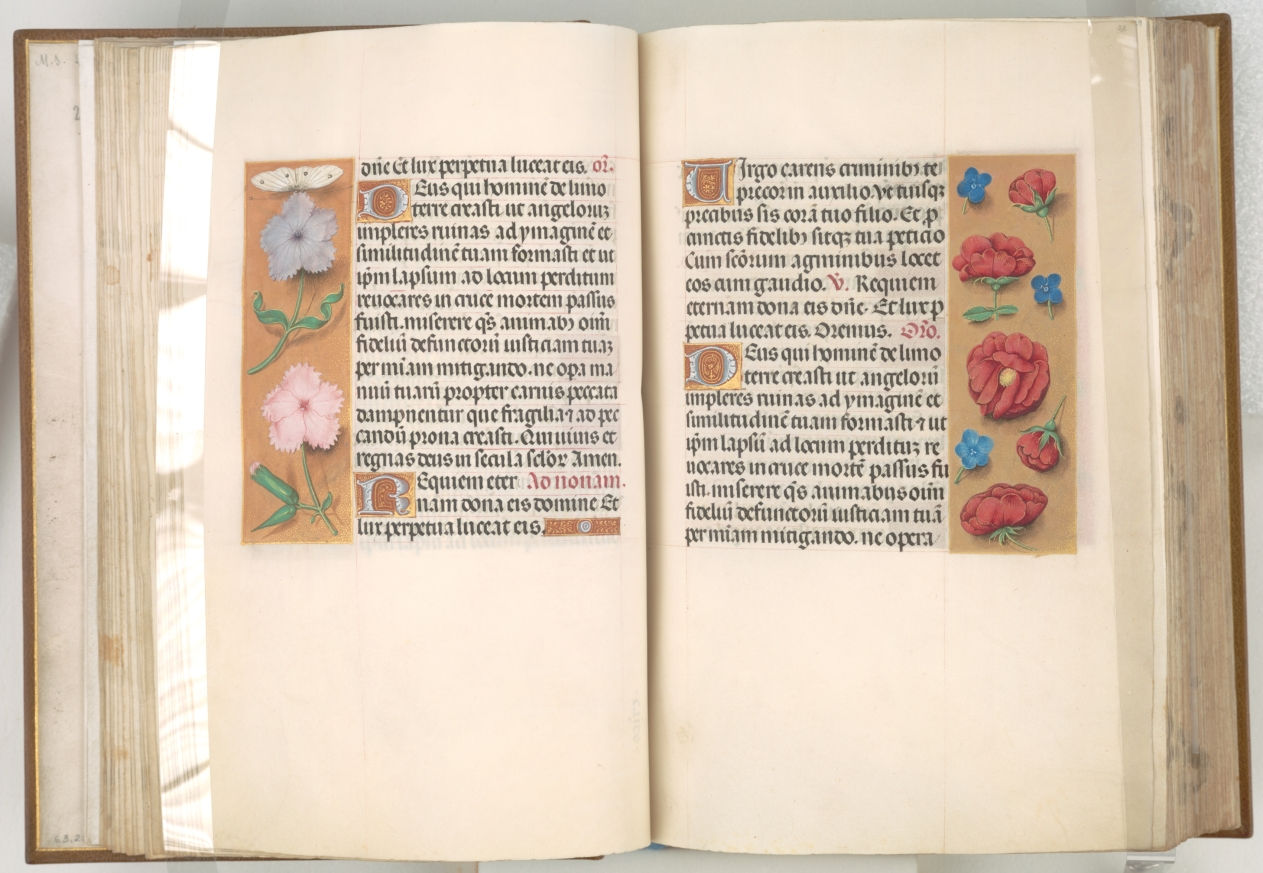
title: Hours of Queen Isabella the Catholic, Queen of Spain: Fol. 28r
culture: Flanders, Ghent and Bruges, late 15th century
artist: Master of the First Prayerbook of Maximillian (Flemish, c. 1444–1519)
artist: and Associates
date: c. 1500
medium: ink, tempera, and gold on vellum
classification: Bound Volume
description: A great lover of Flemish art, Queen Isabella treasured her many devotional books. This deluxe manuscript was created for her private devotions by highly organized and distinctly talented manuscript painters active in Ghent and Bruges. The Ghent-Bruges school represents the culmination of Flemish book painting, whose main features were the use of rich colors, illusionistic effects, a love of landscape, and a strong sense of visual narrative. Manuscripts produced by this circle of artists are renowned for their border decoration featuring a rich variety of realistically painted flowers, scrolling acanthus leaves, birds, and butterflies.